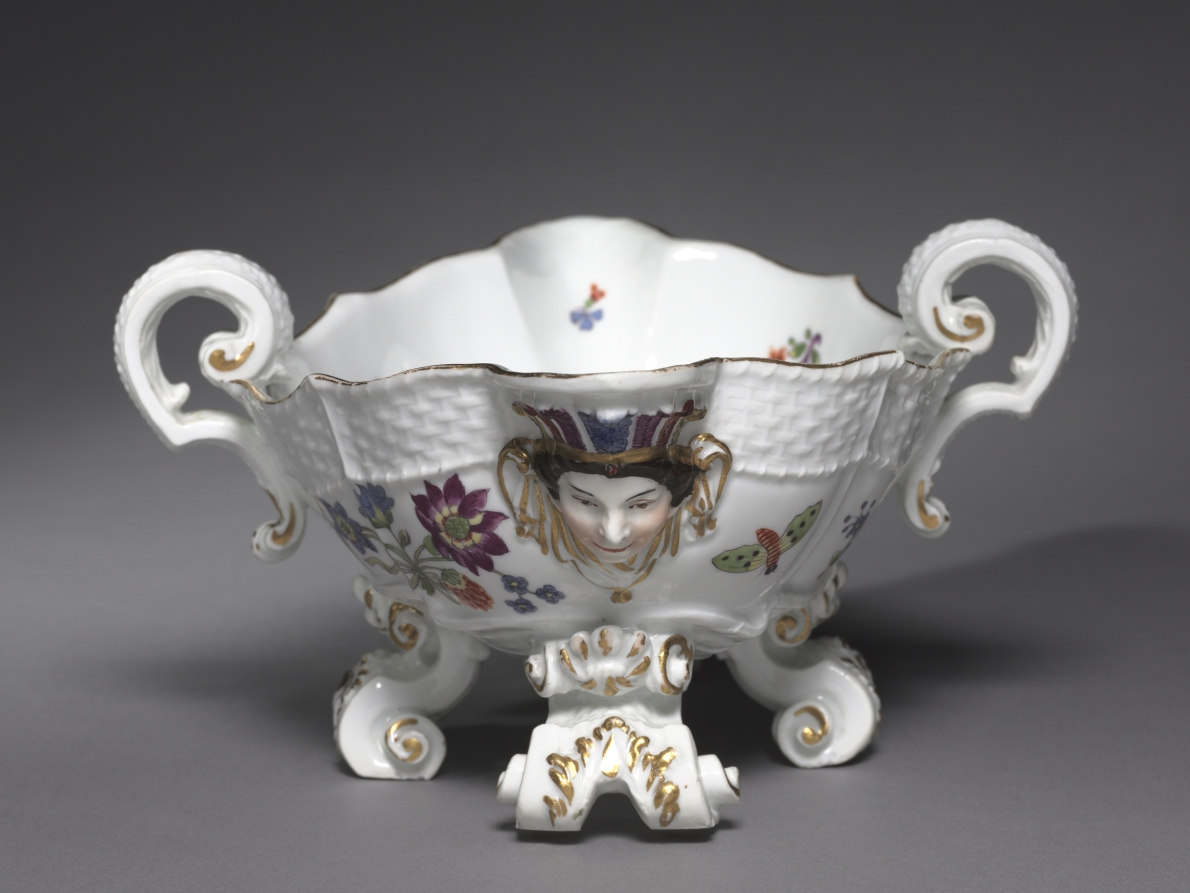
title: Sauceboat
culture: Germany, Meissen, Johann Joachim Kandler period 1735-56, 18th Century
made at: Meissen Porcelain Factory (German, est. c. 1710)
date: 1735–56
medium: porcelain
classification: Ceramic